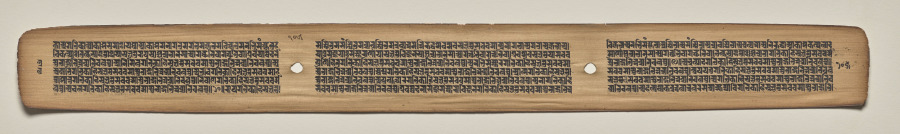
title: Text, Folio 105 (verso), from a Manuscript of the Perfection of Wisdom in Eight Thousand Lines (Ashtasahasrika Prajnaparamita-sutra)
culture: Eastern India, Bihar, Vikramashila Monastery. Painting: Nepal, Kathmandu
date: Sunday, September 14, 1119 (year 239 of the Newar Samvat in the month of Ashvina)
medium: gum tempera and ink on palm leaves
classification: Painting